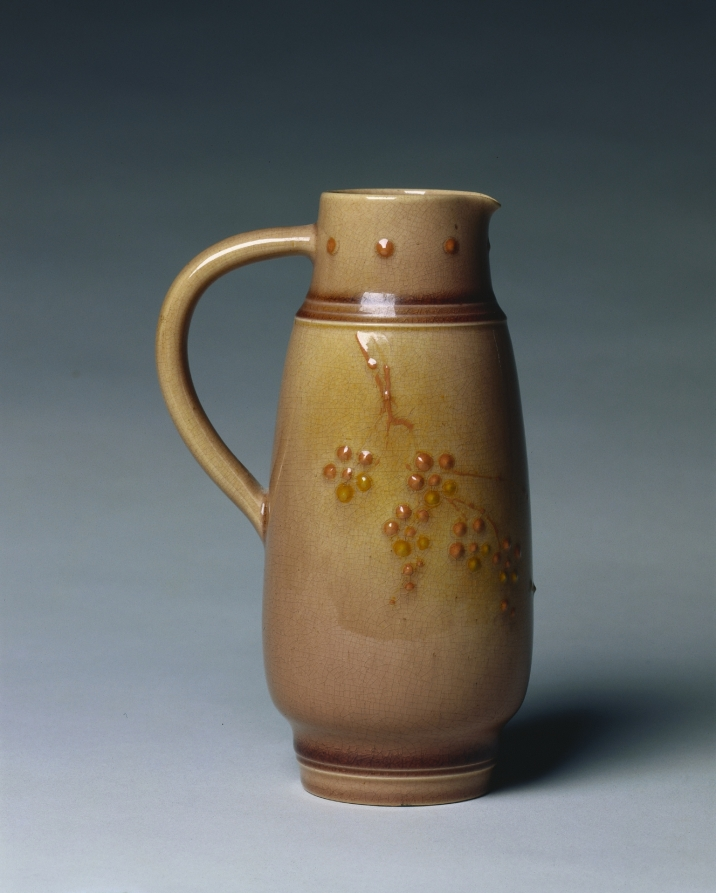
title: Small Pitcher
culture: America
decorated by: Martin Rettig (American, 1869–1956)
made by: Rookwood Pottery Company (American, established 1880)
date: 1885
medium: earthenware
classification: Ceramic